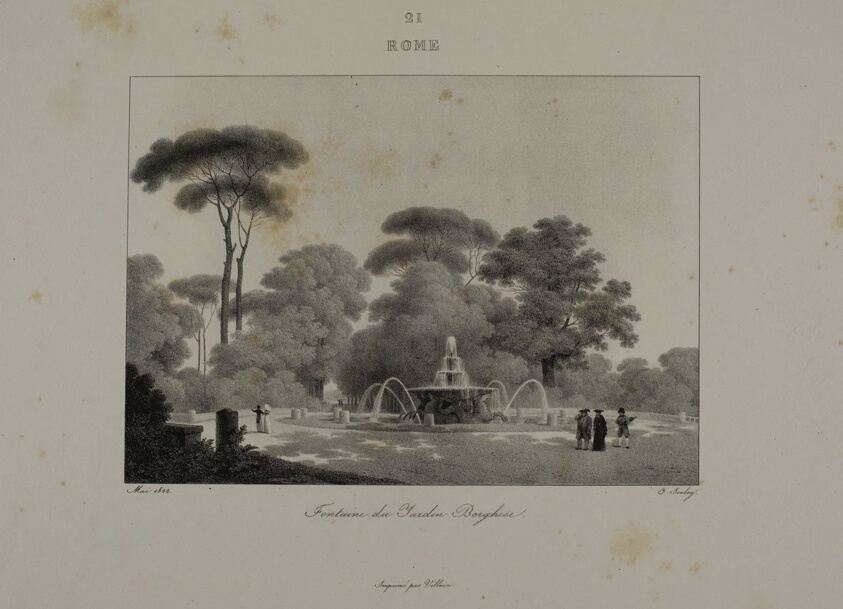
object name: Print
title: Fountain in the Garden of the Villa Borghese, Rome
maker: Jean Baptiste Isabey (French, 1767-1855); printed by Eugène Marie François Villain (French, born 1821)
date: 1822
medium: Lithograph in black on ivory wove paper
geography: France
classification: lithograph; print; prints and drawing